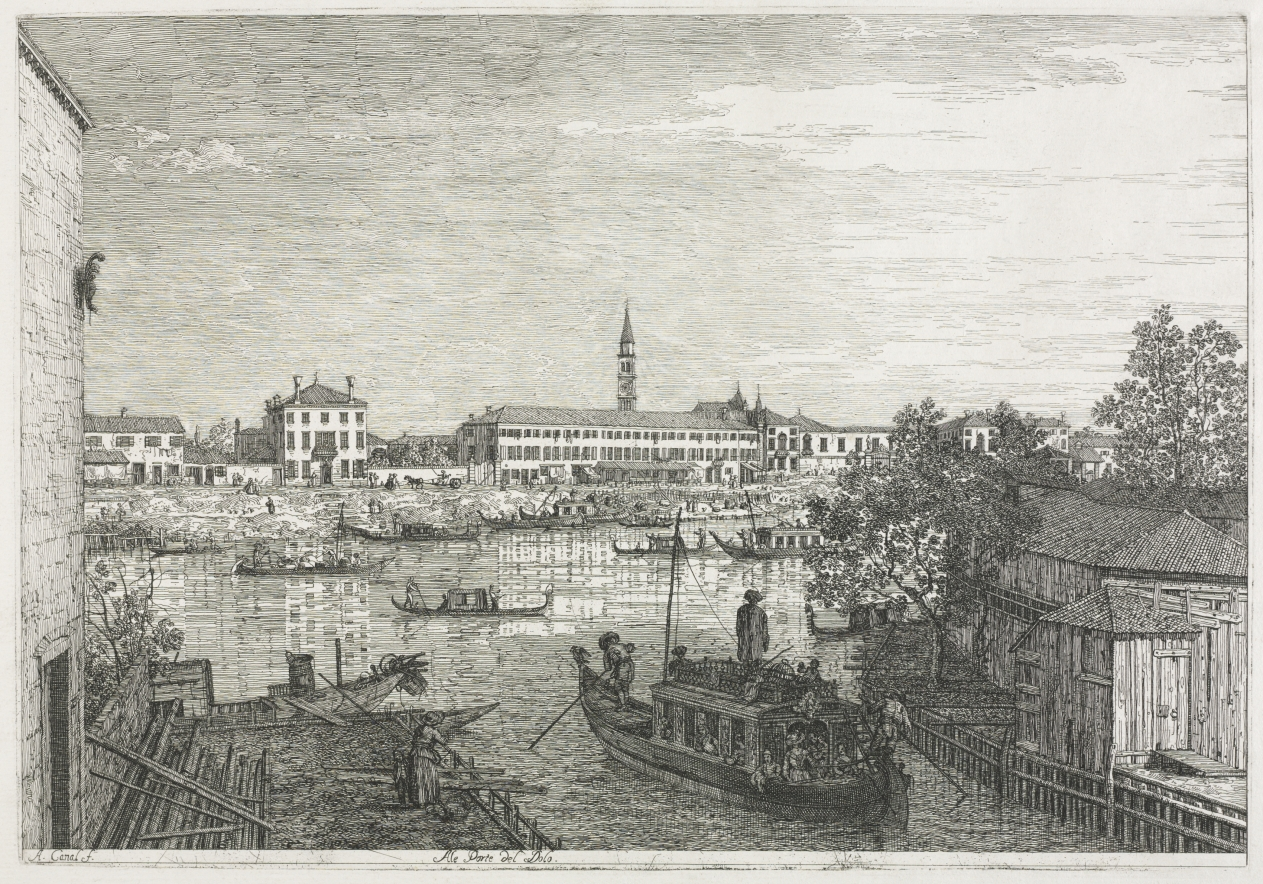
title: Views: The Harbor at Dolo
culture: Italy, Venice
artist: Antonio Canaletto (Italian, 1697–1768)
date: 1735–1746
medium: etching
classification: Print